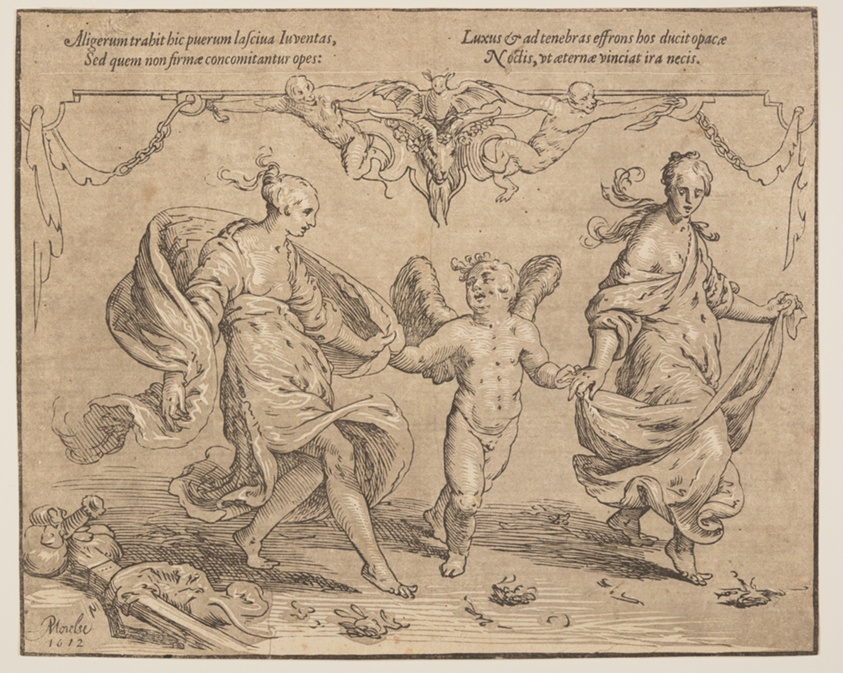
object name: Print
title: Cupid with Youth and Luxury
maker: Paulus Moreelse (Dutch, 1571–1638)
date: 1612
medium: Chiaroscuro woodcut from two blocks, with letterpress text, on ivory laid paper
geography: Netherlands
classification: print; paper; prints and drawing; chiaroscuro woodcut